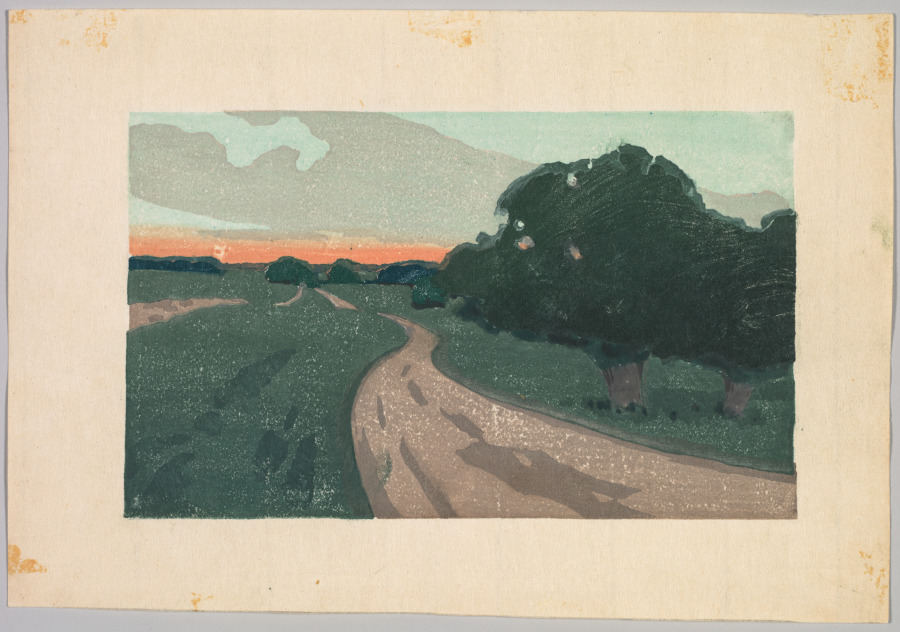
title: The Long Road or Argilla Road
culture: America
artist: Arthur Wesley Dow (American, 1857–1922)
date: c. 1898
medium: Color woodcut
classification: Print